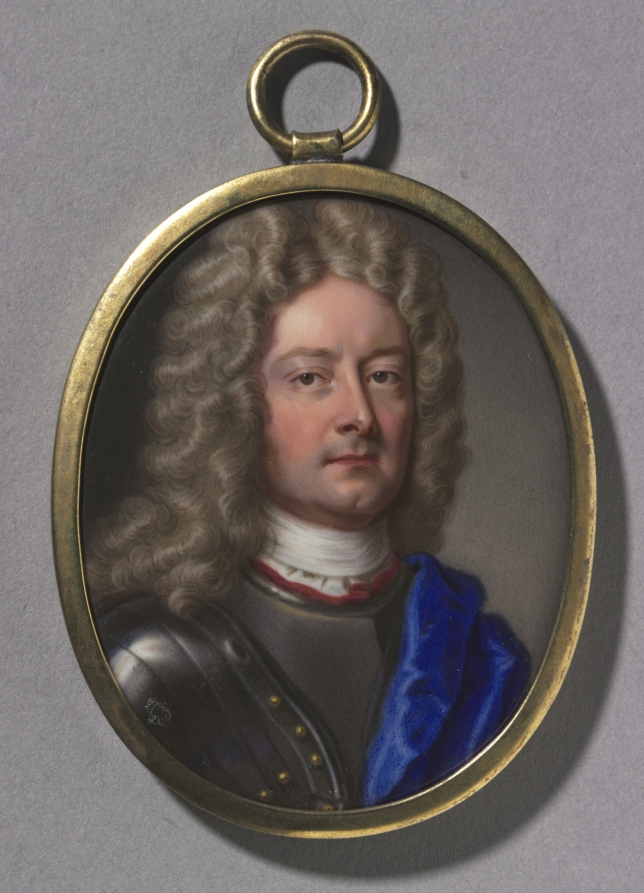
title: Portrait of John Churchill, 1st Duke of Marlborough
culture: England, 18th century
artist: Christian Friedrich Zincke (German, 1683/85–1767)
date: 1715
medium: enamel on copper in a gilt metal frame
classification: Portrait Miniature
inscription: signed on back: CF Zincke fecit/ 1715. [CF in monorgram].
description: Unlike fragile portrait miniatures painted in watercolor on vellum or ivory, which are prone to cracking, fading, and flaking, enamels are resilient, impervious to the effects of light, and retain their striking original colors over time. Partly for this reason enamel was considered ideal for reproducing famous paintings and treasured portraits in a reduced and luminous form. The complicated and labor-intensive process of enameling required the artist to fire numerous layers of colored metal oxide at different temperatures, which made it difficult to produce a faithful portrait likeness, though masters of the medium were able create portraits of remarkable subtlety imbued with the sitter's personality. The heyday of enamel painting was the late 1600s and early 1700s. Among the enamel specialists was Zincke, who worked in England where he was patronized by Queen Anne, King George I, and King George II.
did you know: Although miniatures are often regarded as a private art form exchanged between loved ones, the nature of this enamel was likely political.